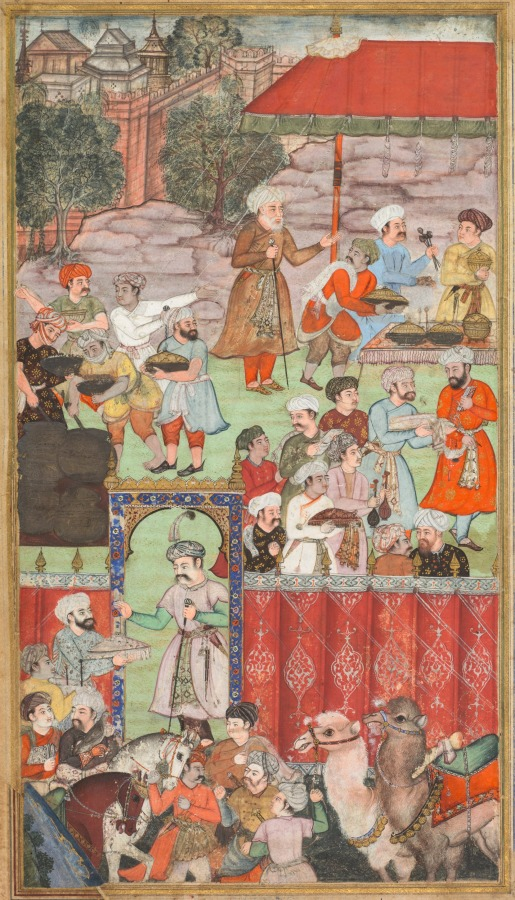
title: A feast for Babur hosted by his half-brother Jahangir Mirza in Ghazni in May 1505, from a Babur-nama (Memoirs of Babur)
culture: India, Mughal, 16th century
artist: Basavana (Indian, active c. 1560–1600)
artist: and Madhav Khurd (Indian, active late 1500s)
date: c. 1589; outer margins added c. mid-1900s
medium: Gum tempera and gold on paper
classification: Painting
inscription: verso: Persian text, in nasta‘liq script: . . . presented many gifts. In that year most of the rivers had become very swollen, to the extent that the Dih-i Ya‘qub River could not be forded. I brought the boat I had made at the lake and floated it in the waters of Dih-i Ya‘qub opposite Kamri and all the people crossed by boat. For this reason we went through the Sajavand pass and straight through crossing the river at Kamri by boat. We arrived at Kabul in the month of Dh’ul-Hijja [May 1505]. A few days earlier, Sayyid Yusuf Beyg had died of colic. At Kush Gunbad, Nasir Mirza had requested leave and remained behind to get provisions for his retinue from his own domain, saying he would follow in two or three days. Once he had left us he sent his entire army to the Nur valley on account of a minor act of disobedience by the people of the Nur valley. [Given] its rice fields and the location of its citadel on the peak of the mountain as . . .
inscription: recto: Persian inscription in bottom margin, in nasta‘liq script: the work of Basavana / [ . . . ] / Madhav Khurd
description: Twenty-one years before his conquest of Delhi, Babur took control of territories in Afghanistan, including the cities of Kabul and Ghazni. His half-brother, who controlled the region around Ghazni, ordered that a party be thrown in honor of Babur’s arrival from the north. Drinking parties and feasts in lavish movable tent settings, where gifts were exchanged, alliances forged, and relationships cemented, were as important to the building of the empire as the battles.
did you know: A manager directs servers to bring spoons and lay out the buffet table.